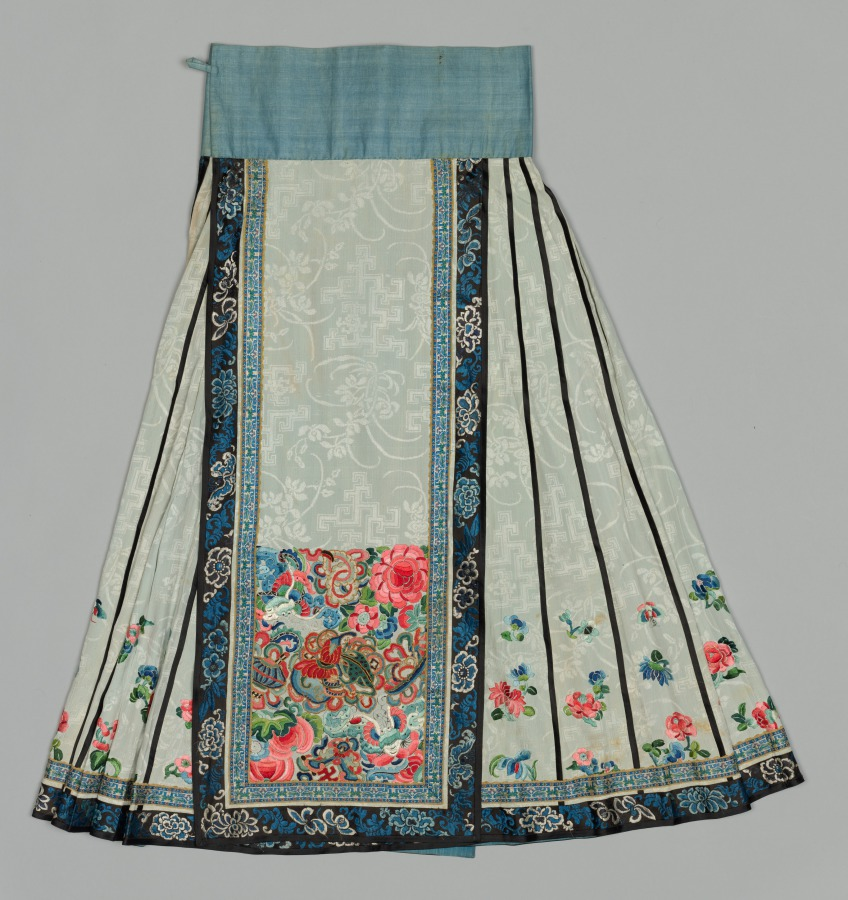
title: Skirt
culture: China, 19th century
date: 1800s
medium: embroidery, silk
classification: Garment